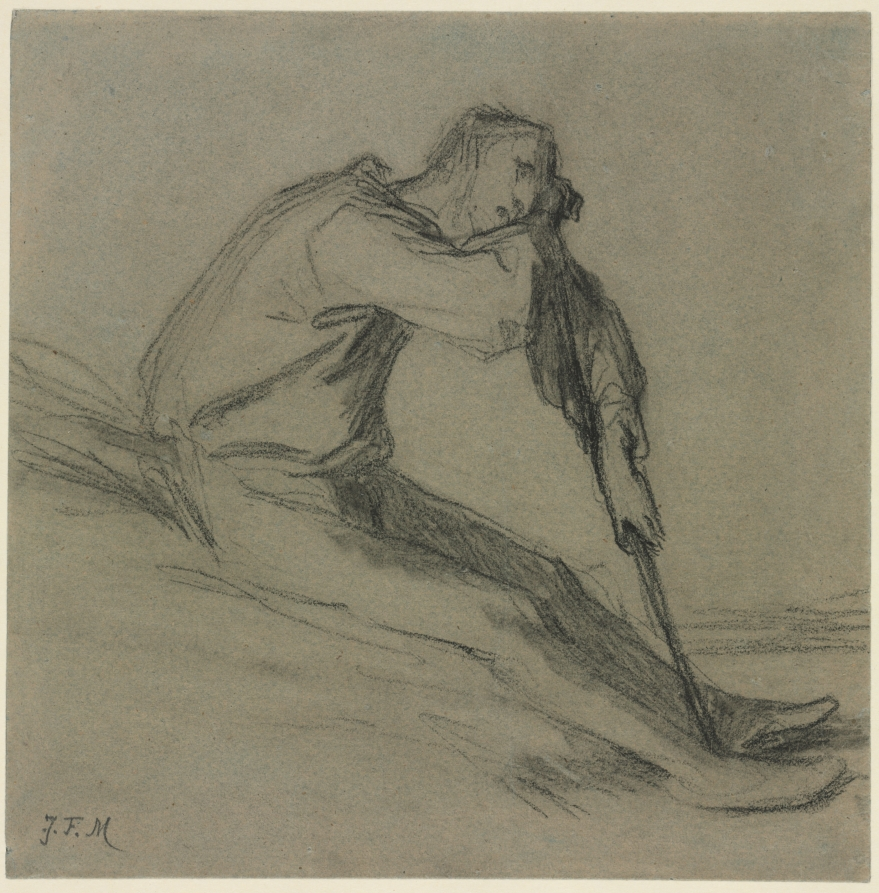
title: Seated Peasant Resting on a Hoe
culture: France, 19th century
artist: Jean-François Millet (French, 1814–1875)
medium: fabricated black chalk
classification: Drawing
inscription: inscribed in graphite, lower left: "J. F. M."